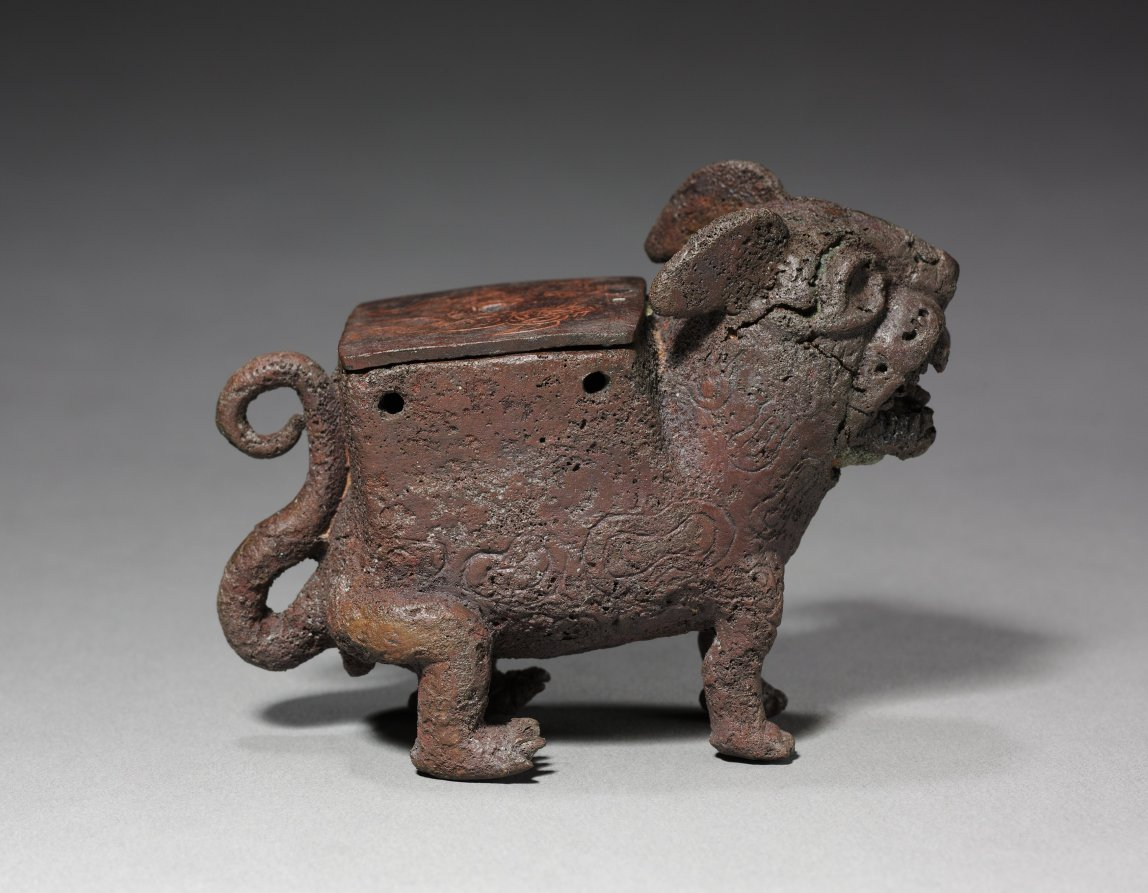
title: Male Feline-Shaped Container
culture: Peru, North Coast, Moche style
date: 50–800 CE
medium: cast copper alloy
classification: Sculpture